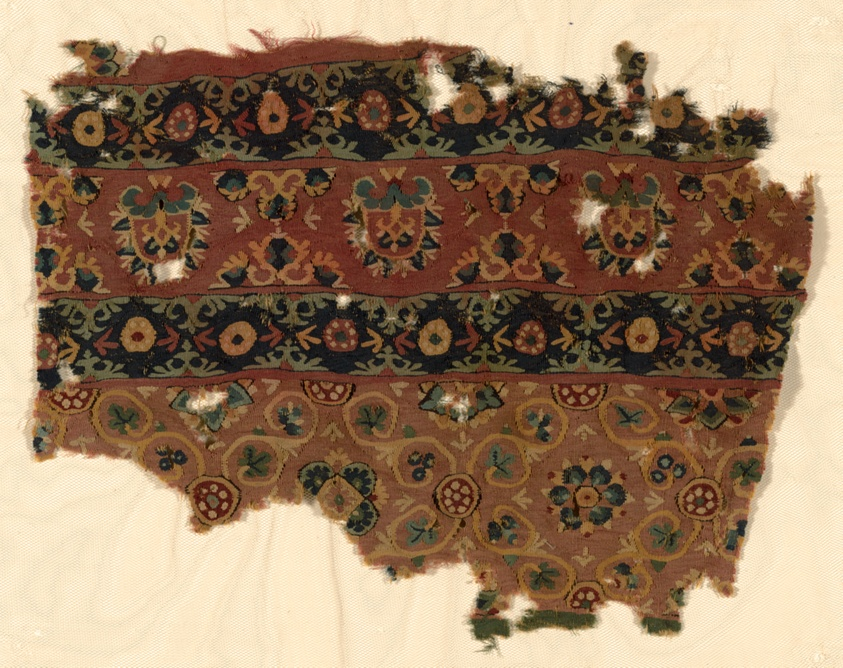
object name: Textile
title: Fragment (Furnishing Fabric)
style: umayyad, persian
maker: Iran, Iraq, or Egypt (Persia)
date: Middle of the 8th century, Umayyad Dynasty (661–750)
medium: Wool, tapestry weave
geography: Persia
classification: textile; weaving; furnishing textile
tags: flowers, medallions, roses